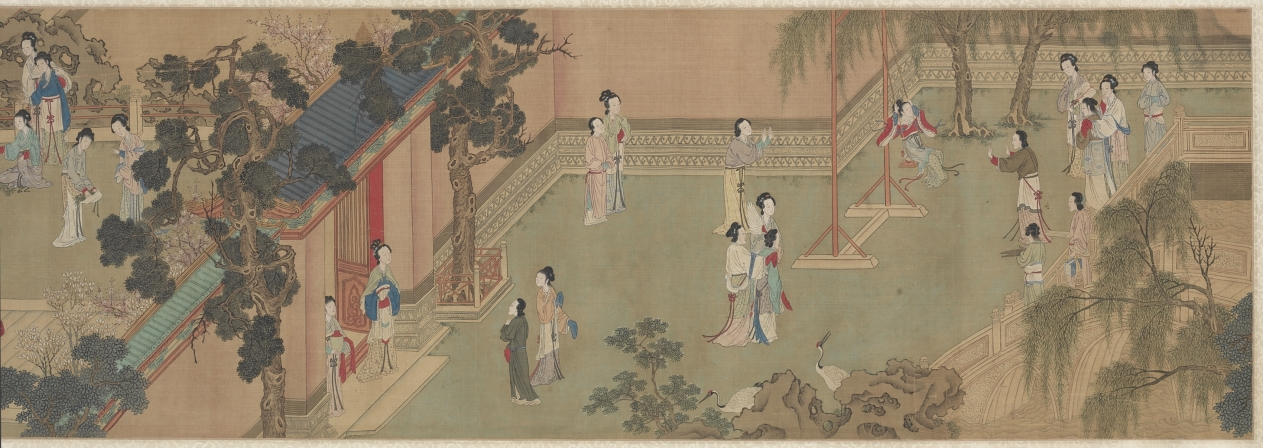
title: Palace Ladies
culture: China, Qing dynasty (1644-1911)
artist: copy after Qiu Ying (Chinese, 1494–1552)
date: 1644–1911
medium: handscroll, ink and color on silk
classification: Painting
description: This handscroll illustrates the pursuits of court ladies in a palace precinct on a spring day. Women, young girls, and their maids amuse themselves by sitting on a swing, playing games, watering and admiring peonies, performing music together, playing the qin (zither), feeding a parrot on the balustrade and fish in the water, or catching butterflies. The life of elite women was mostly restricted to the so-called inner quarters, meaning the garden and inner courts of the house. This painting idealizes the world of young palace girls that in fact was often filled with boredom and waiting for a lover.